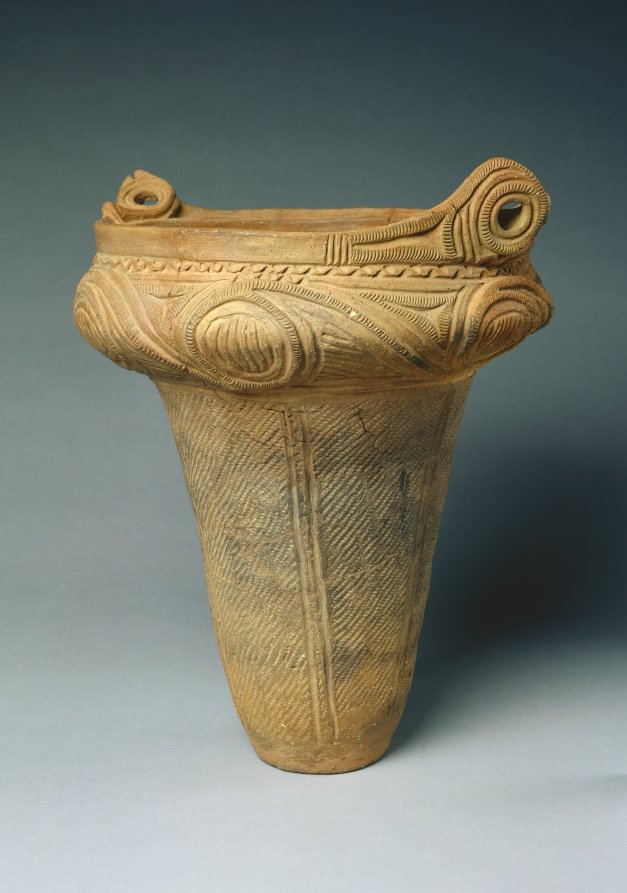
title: Urn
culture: Japan, Jōmon period (c. 10,500–300 BCE)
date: c. 2000 BCE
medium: earthenware, terracotta, impressed and incised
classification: Ceramic